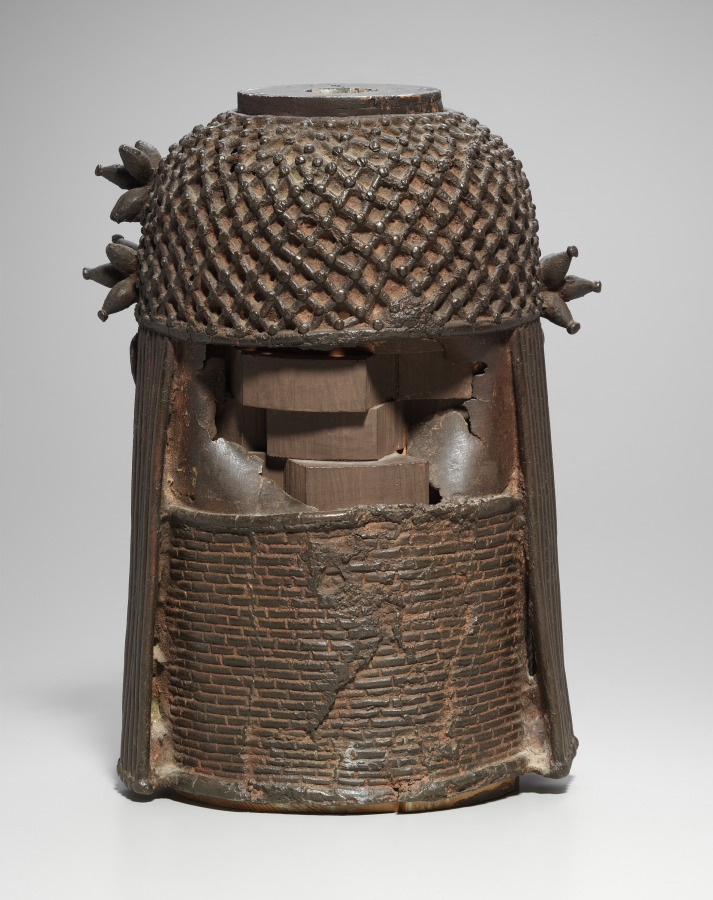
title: Ancestral Commemorative Head (uhunmwun-elao)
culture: Nigeria, Benin Kingdom, Ẹdo peoples, members of the Igun Eronmwon (royal brasscasters) guild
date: possibly mid-1500s or early 1600s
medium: Copper alloy and iron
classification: Sculpture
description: Brass heads are among many objects a new Ọba commissions when dedicating a shrine to their predecessor. This head of an Ọba wears layered necklaces of royal coral beads. Tubular beads adorn both the netted cap and slender braids alongside his temples. While representing an individual, his facial features and calm expression are idealized. The thickly cast head once supported a tusk. Immune to corrosion, brass symbolizes royal permanence. A personal religious object, this head sat on an ancestral altar in the Ọba’s palace. Like many works taken from Benin altars, this contrasts with its present-day public display in an American museum.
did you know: The obas (kings) of the Benin Kingdom still wear coral headpieces and jewelry like this sculpted head depicts.